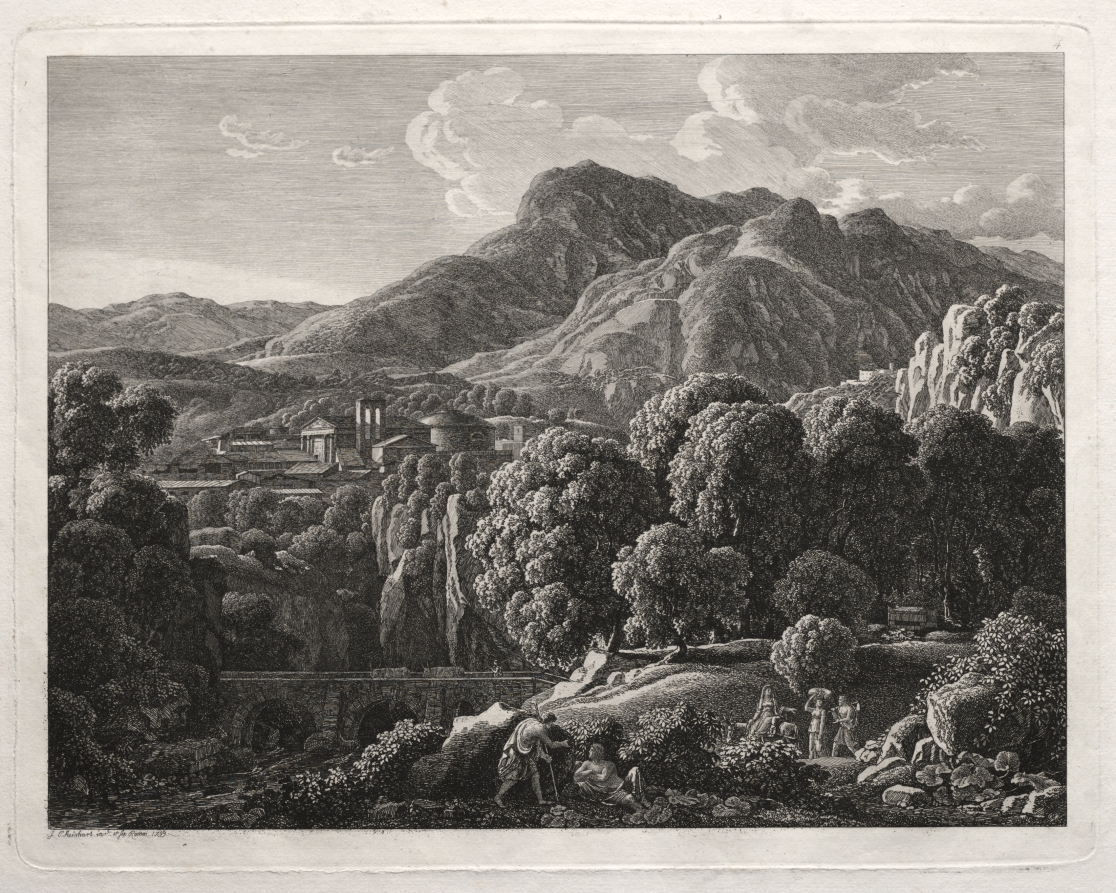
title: Heroic Landscape: Landscape with Town and River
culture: Germany, 19th century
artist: Johann Christian Reinhart (German, 1761–1847)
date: 1799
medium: etching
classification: Print